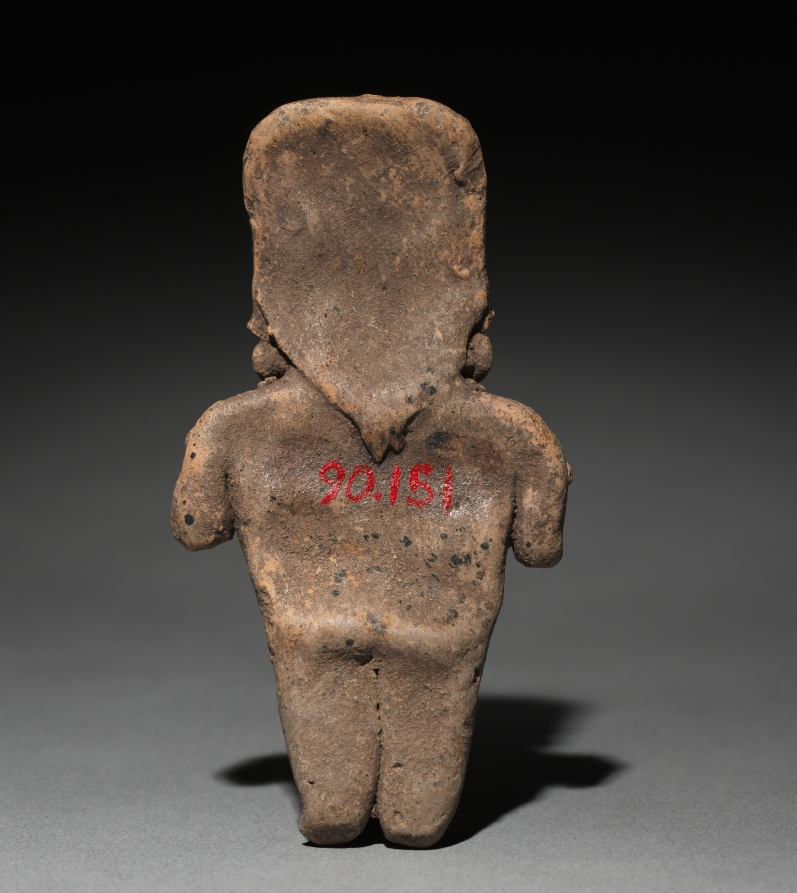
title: Female Figurine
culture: Mesoamerica, Guanajuato or Michoacán, Chupícuaro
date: 400–100 BCE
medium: ceramic, pigment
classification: Sculpture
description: The Chupícuaro culture, located north of Mexico City in the state of Guanajuato, created a distinctive ceramic tradition including small clay figurines. This example is said to belong to a group of ten figurines from the same burial or cache (1990.145–154). The group includes both males and females that can be sorted into couples based on size.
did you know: Groups of figurines were sometimes arranged in scenes and likely used in household rituals.